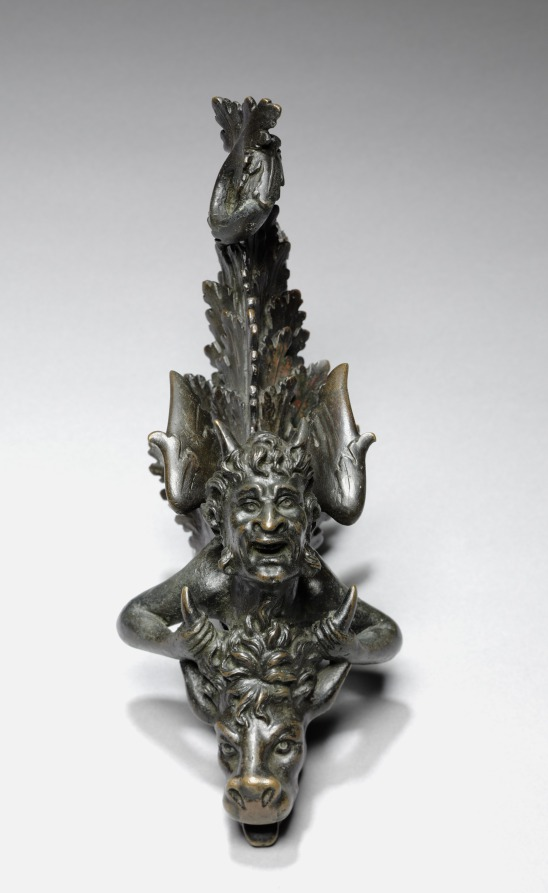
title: Doorknocker with a Satyr Pulling an Ox's Horns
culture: Italy, early 16th Century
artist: Andrea Riccio (Italian, c. 1470–1532)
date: 1800s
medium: bronze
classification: Sculpture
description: Fanciful bronzes such as this one were extremely popular in the late 1500s in the north of Italy, where sculptors such as Andrea Riccio and Severo da Ravenna often featured bizarre imaginary creatures in their sculptures. These artists exerted a long-lasting influence on their peers and followers for the remainder of the 1500s. However, this sculpture was not made in the 1500s. Based on the weight and style of the Doorknocker, it is most likely that it was made in the 1800s to mimic the style of Riccio and his followers. This sculpture is solid; in the 1500s artists created hollow sculptures to reduce the costs of the object and to decrease the chances of flaws in the sculpture. However, in the 1800s when better bronze casting technology evolved and the price of the metal was less costly, artists created solid bronze sculptures based on sixteenth-century designs. In particular, there was a considerable market in England for Renaissance revival doorknockers to be used decoratively on pub doors.